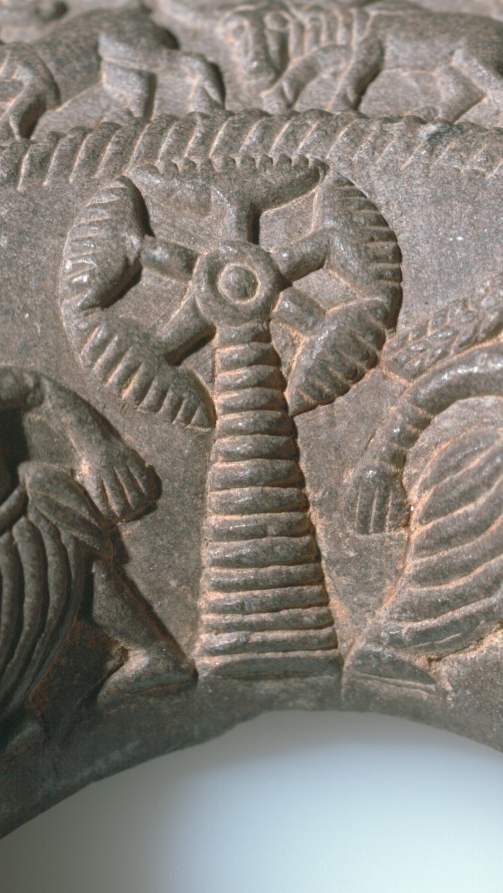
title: Ringstone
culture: India, Maurya period (322–185 BCE)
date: 200s BCE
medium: steatite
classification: Sculpture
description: Ringstones are among the earliest works of art to be created in stone during India's historical period. This example is finely carved with detailed images of affectionate couples and palm trees, running animals, and geometric motifs in concentric circles. The function of ringstones remains uncertain, since none of the surviving examples is inscribed or explained in a text.